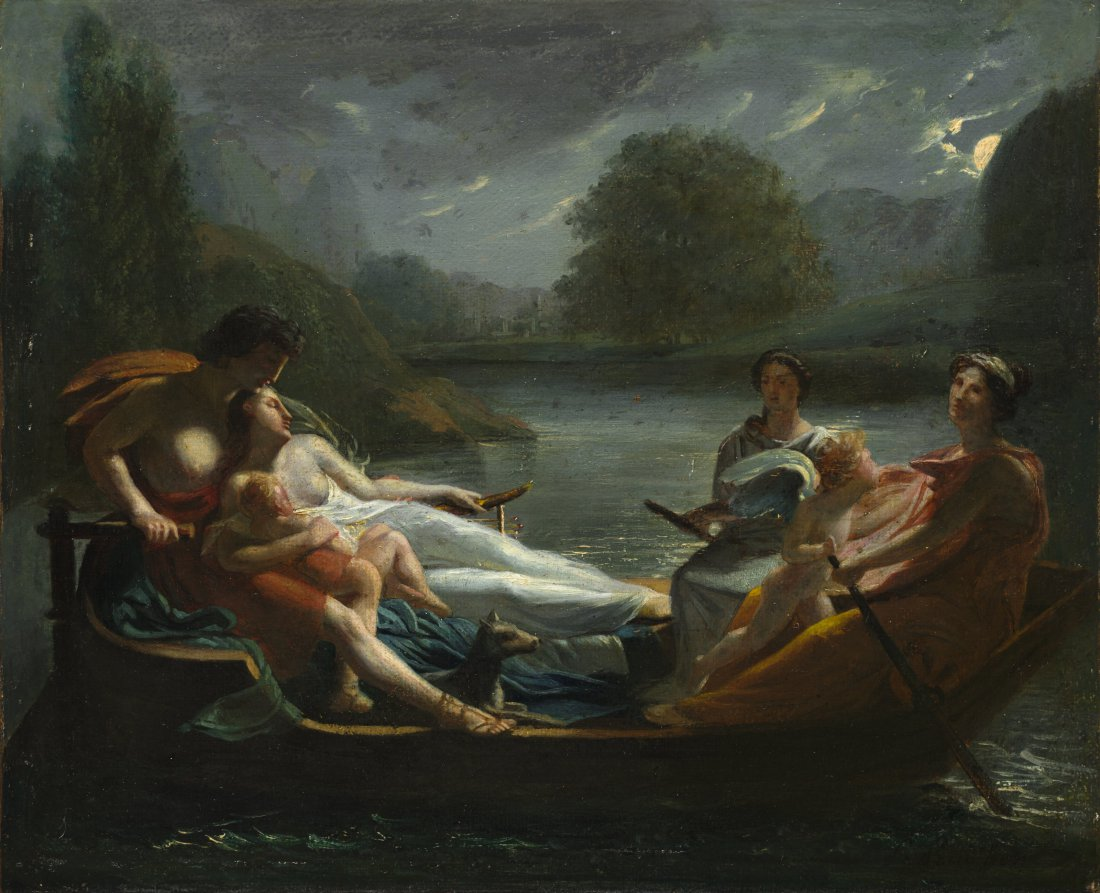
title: The Dream of Happiness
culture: France, 19th century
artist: imitator of Pierre-Paul Prud'hon (French, 1758–1823)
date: after 1819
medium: oil on fabric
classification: Painting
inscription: Signed lower right: P. Prud'hon